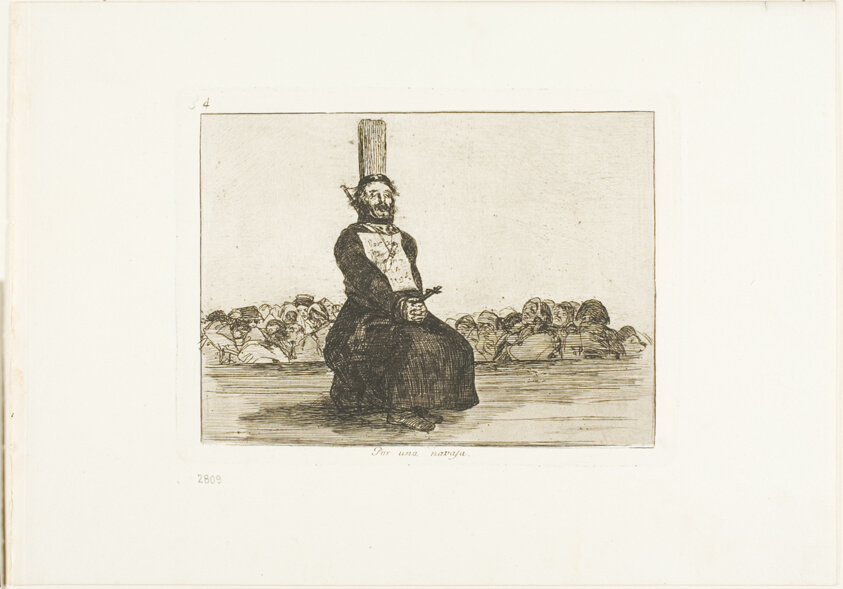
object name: Print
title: On account of a knife, plate 34 from The Disasters of War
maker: Francisco José de Goya y Lucientes (Spanish, 1746-1828)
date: 1812/15, published 1863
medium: Etching, drypoint, burin and burnishing on ivory wove paper with gilt edges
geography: Spain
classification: etching; print; prints and drawing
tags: war